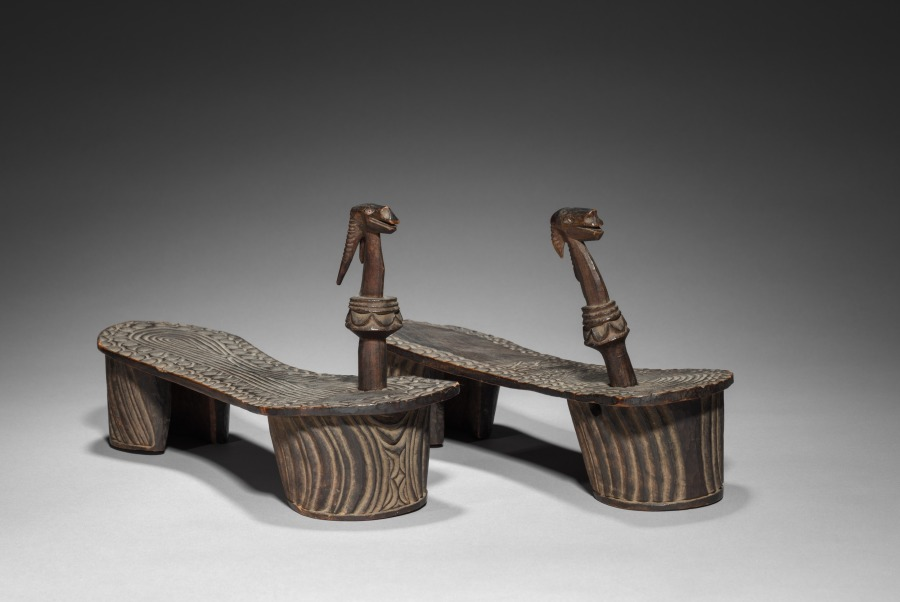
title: Sandals (mitalawanda / mitawanda) or Clogs (kiatu cha mti)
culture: Africa, Central Africa, Democratic Republic of Congo, unidentified carver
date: c. 1800s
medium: Wood and glass beads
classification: Garment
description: Common in the Indian Ocean region, wooden sandals changed meaning across place and time. This pair’s base elevates the foot as the toes grip an antelope-shaped peg (msuruaki). Crisp geometric sole designs suggest they were rarely worn. East African elites and merchants once had exclusive rights to wooden shoes, wearing elaborate ones only for portraits. Formerly enslaved people living along the coast wore simpler ones from the 1840s onward, adopting elite footwear to assert their liberation. However, slave traders like the Zanzibari “Tippu Tip” (c. 1832–1905) likely brought mitalawanda to Central Africa; stylistic elements of this pair hail from that region.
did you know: This distinctive footwear traveled from Southeast Asia and the Middle East to Africa, first to the Swahili Coast and then further inland to parts of Central Africa. The deity Krishna wears similar shoes (paduka) in an eighteenth-century Indian miniature painting (2003.344).